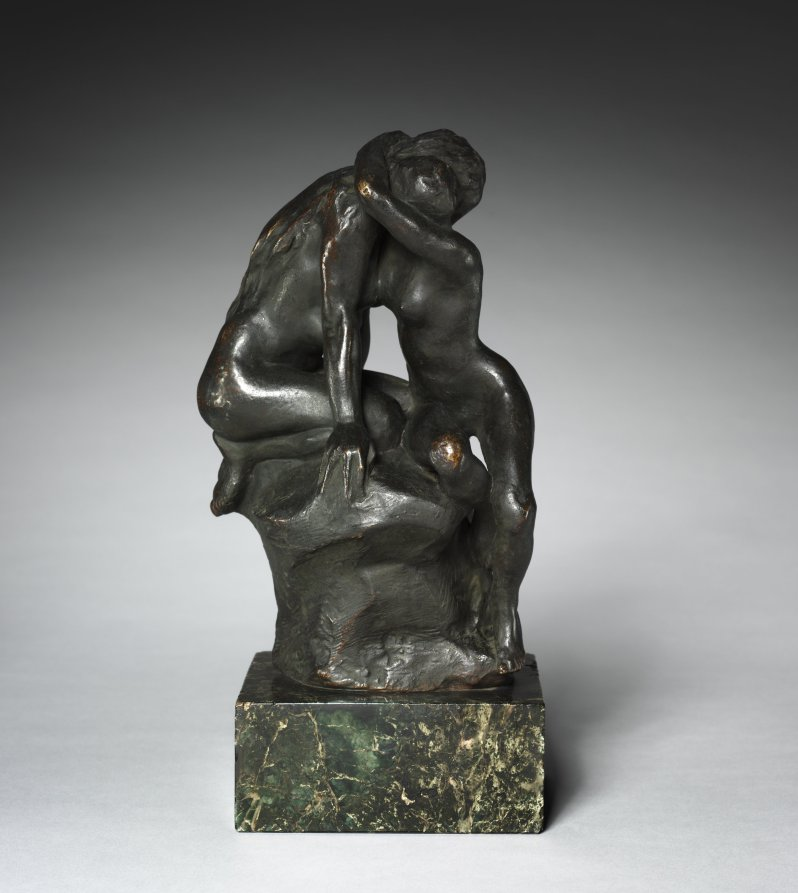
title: Young Girl Confiding Her Secret to Isis (Jeune fille confiant son secret à Isis)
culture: France, 19th century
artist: Auguste Rodin (French, 1840–1917)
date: 1899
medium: bronze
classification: Sculpture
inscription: Inscribed in area below larger figure's left hand and smaller figure's right hand: "Rodin"; below feet of larger figure: "L. Persinka, Fondeur, Versailles"